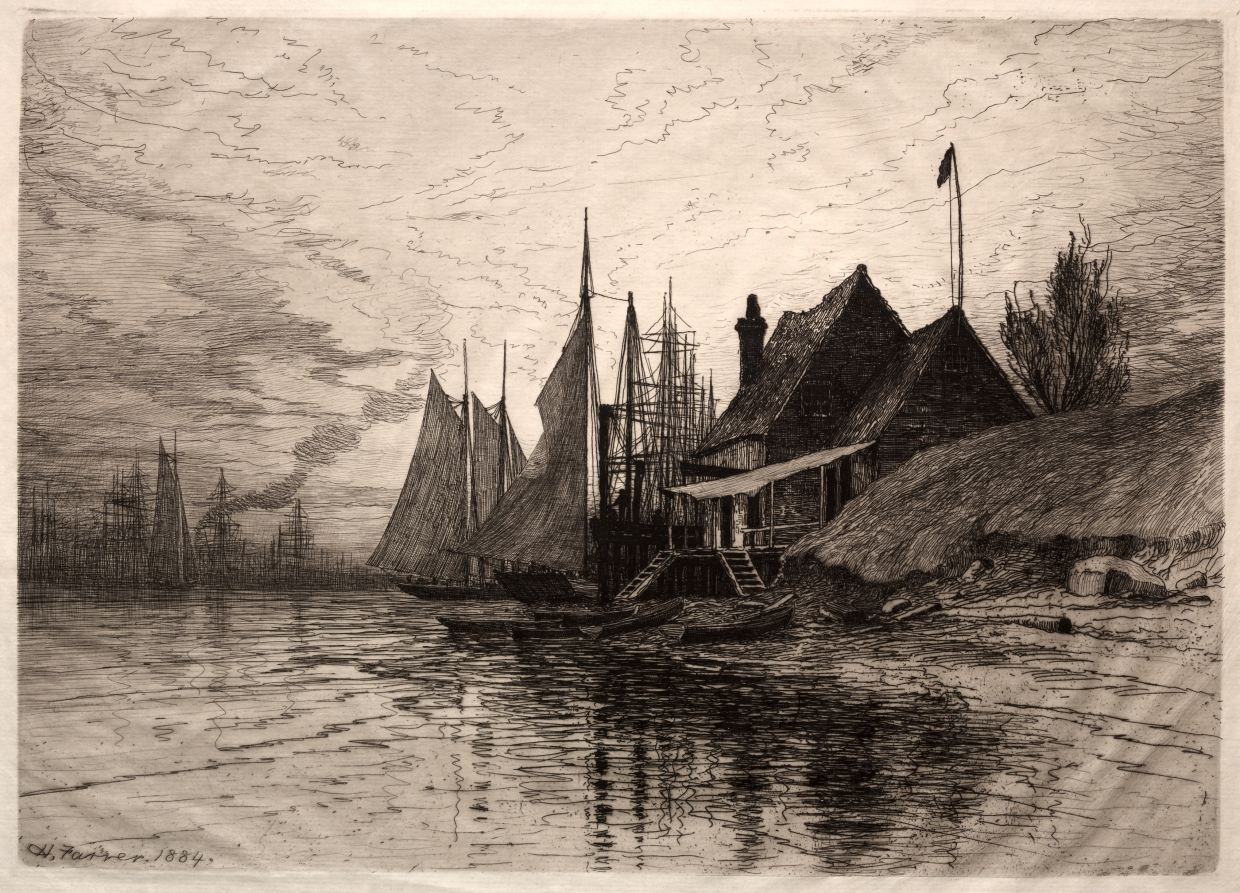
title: Evening, New York Harbor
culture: America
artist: Henry Farrer (American, 1843–1903)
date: 1884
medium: etching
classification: Print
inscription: lower right, in graphite: Henry Farrer